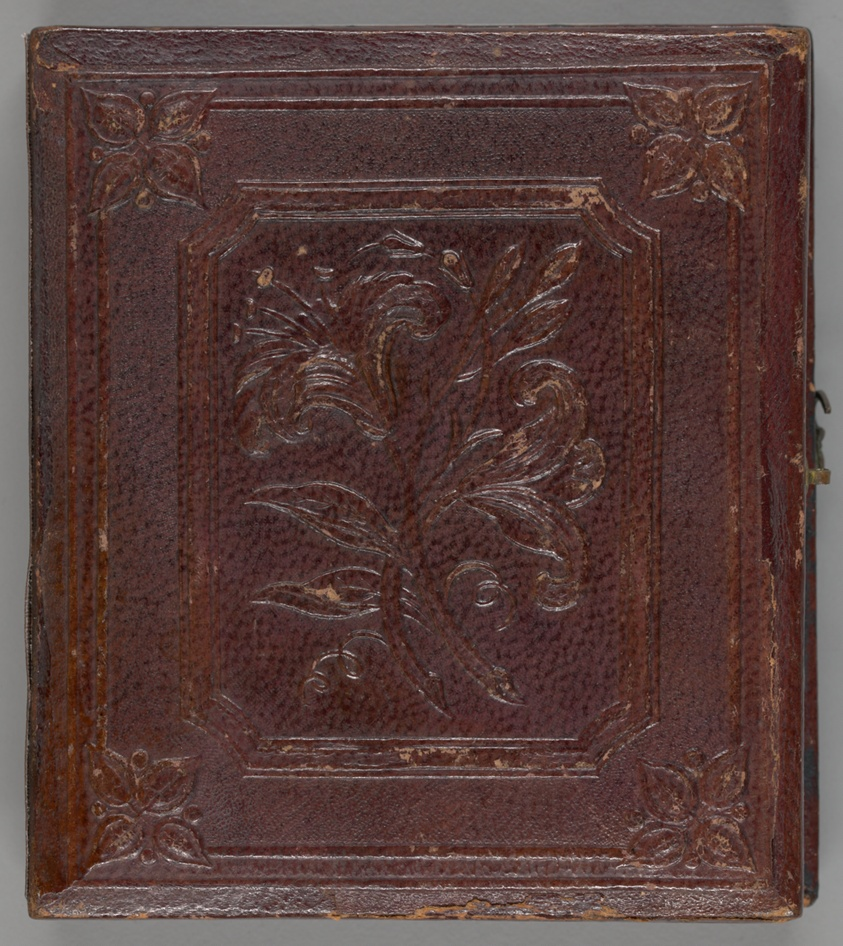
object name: Photograph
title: Untitled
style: 19th century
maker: Artist unknown; 19th century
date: 1839/60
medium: Daguerreotype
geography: Unknown Place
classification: daguerreotype; photographic process; photography; photograph